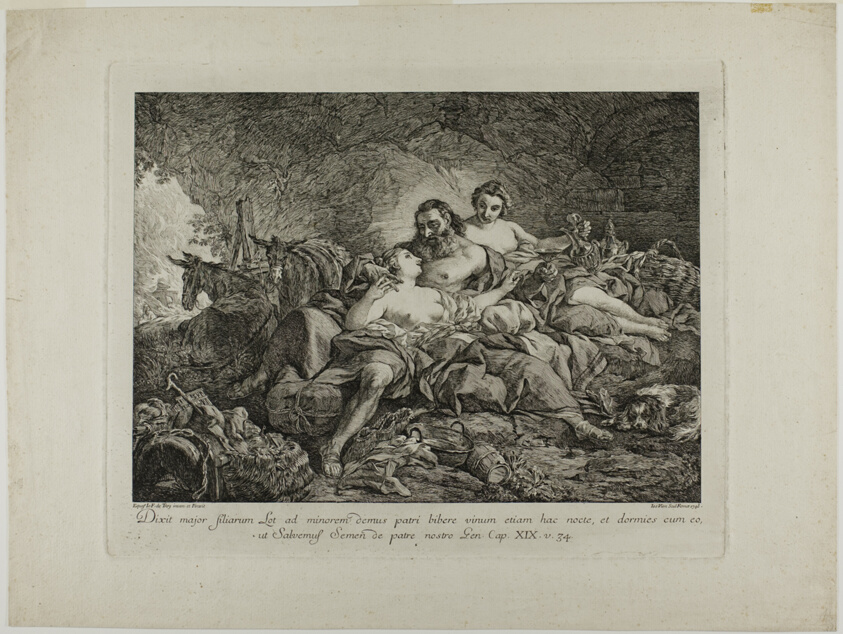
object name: Print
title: Lot and His Daughters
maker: Joseph-Marie Vien, the elder (French, 1716-1809); after Jean François de Troy (French, 1679-1752)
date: 1748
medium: Engraving on ivory laid paper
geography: France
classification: engraving; print; prints and drawing